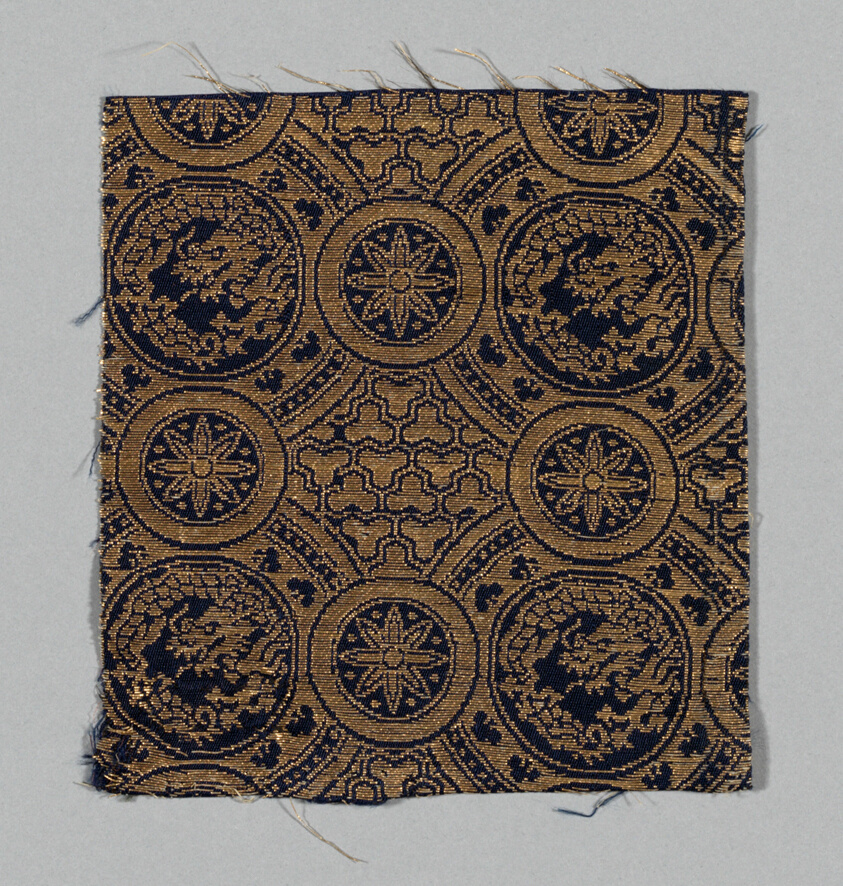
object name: Textile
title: Fragment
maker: Japan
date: Edo period (1615–1868), 1775/1825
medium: Silk and gilded paper strip, twill weave with supplementary patterning wefts bound by secondary binding warps in twill interlacings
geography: Japan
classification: textile; weaving